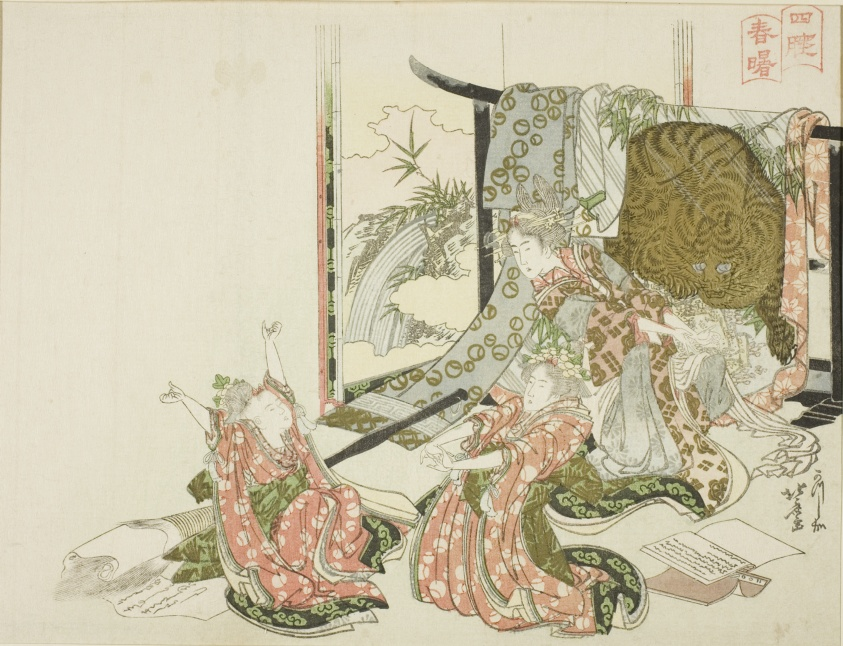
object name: Print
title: The Four Sleepers in Spring Dawn (Shisui shunsho)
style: Japanese (culture or style)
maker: Katsushika Hokusai 葛飾 北斎; Japanese, 1760-1849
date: c. 1806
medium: Color woodblock print; surimono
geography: Japan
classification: print; asian art